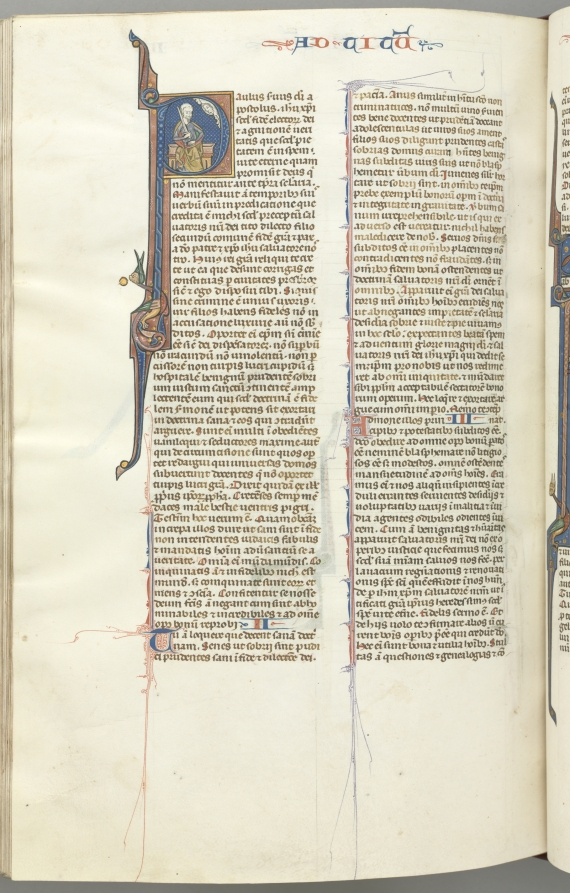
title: Fol. 458v, Titus, historiated initial P, Paul seated with a sword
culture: Southern France, Toulouse(?), 13th century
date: c. 1275–1300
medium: ink, tempera and gold on vellum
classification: Bound Volume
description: Biblical manuscripts were highly prized and important possessions of churches, monasteries, cathedral schools, and universities throughout medieval Europe. The biblical texts were known as the vulgate, the translations made by Saint Jerome in the fourth century from Hebrew and Greek into Latin, which became the definitive and official Latin version of the Roman Church. In the 13th century, the bible was, for the first time, produced as a single volume with an officially sanctioned sequence to its books and chapters as illustrated by this example. The very extensive decoration of this bible is arranged hierarchically to indicate the relative importance of the various texts so that full or almost full-page initials mark the openings of the first prologue, Genesis, and the first Gospel; historiated initials mark the beginning of each book and illuminated initials mark the Prologues.